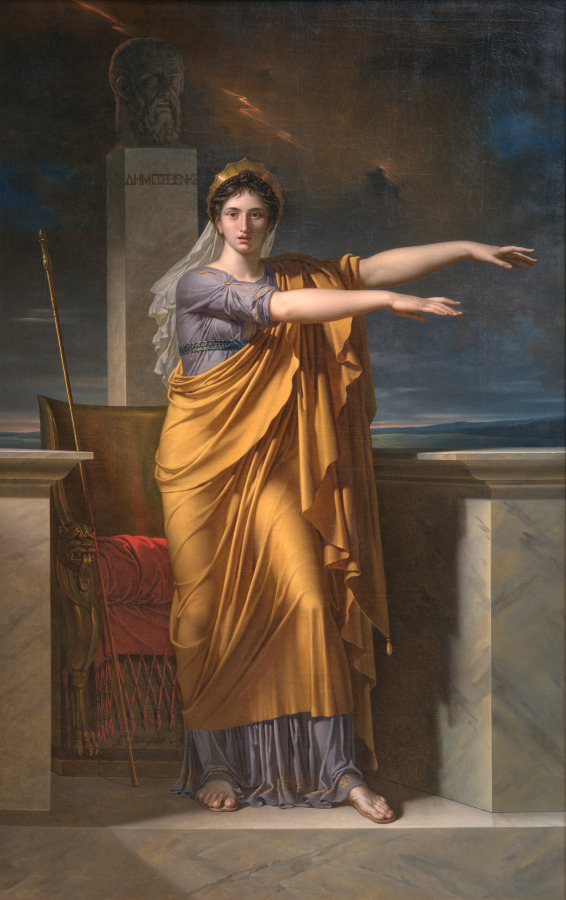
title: Polyhymnia, Muse of Eloquence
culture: France, late 18th-early 19th century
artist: Charles Meynier (French, 1768–1832)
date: 1800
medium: oil on canvas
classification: Painting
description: Polymnia is one of the nine muses in Greek mythology and a patron of dancing or geometry. She is portrayed here standing in front of a bust of the Athenian orator Demosthenes. This painting belongs to a cycle of five works commissioned by businessman François Boyer-Fonfréde for his home in Toulouse.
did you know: Meynier was trained in a studio known by the students of Jacques-Louis David as the atelier of the "perruques" (wigs), a name given to royalists or conservatives of the period.